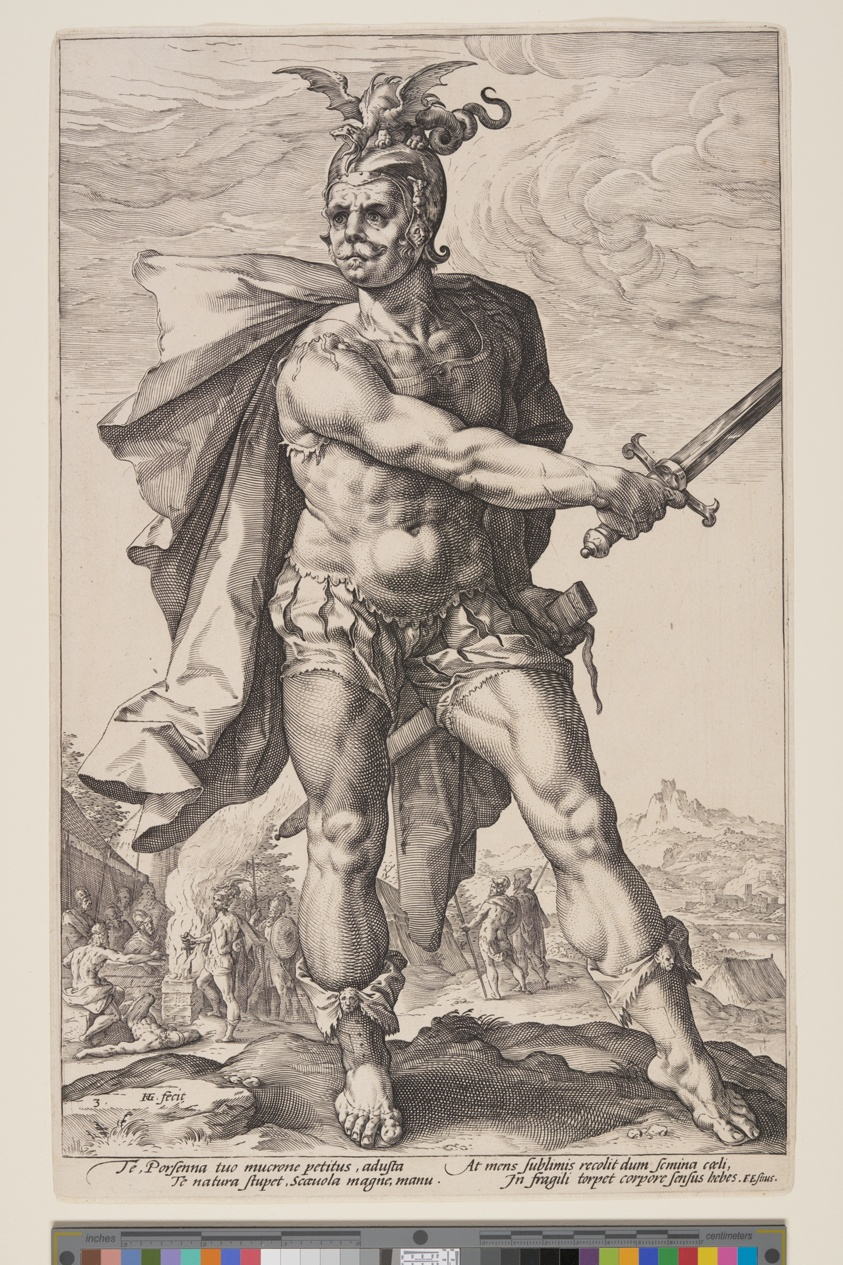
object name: Print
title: Mucius Scaevola, from The Roman Heroes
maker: Hendrick Goltzius (Dutch, 1558–1617)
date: 1586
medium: Engraving on ivory laid paper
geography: Netherlands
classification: print; paper; prints and drawing; engraving